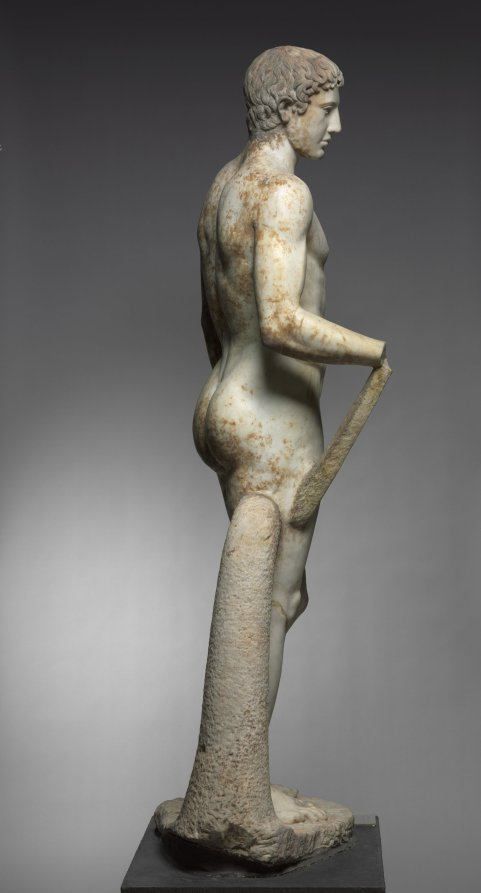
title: Statue of an Athlete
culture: Italy, Roman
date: 1–100 CE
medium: marble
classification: Sculpture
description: This idealized athlete recalls Greek sculptural types invented and popularized during the 400s BC. Large-scale athletes and other sculptures like this were originally created by famous artists as sanctuary dedications. Centuries later, they were widely copied and adapted by Roman sculptors, whose clients sought their own versions of earlier masterpieces. Working in marble rather than bronze, these sculptors added certain elements for stability, such as the struts and the large tree trunk beside the right leg here. Sculptures like this one are profoundly complex, made by and for Romans but descended from Greek ancestors.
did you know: For many years, this sculpture stood in the rotunda of the Cleveland Museum of Art.